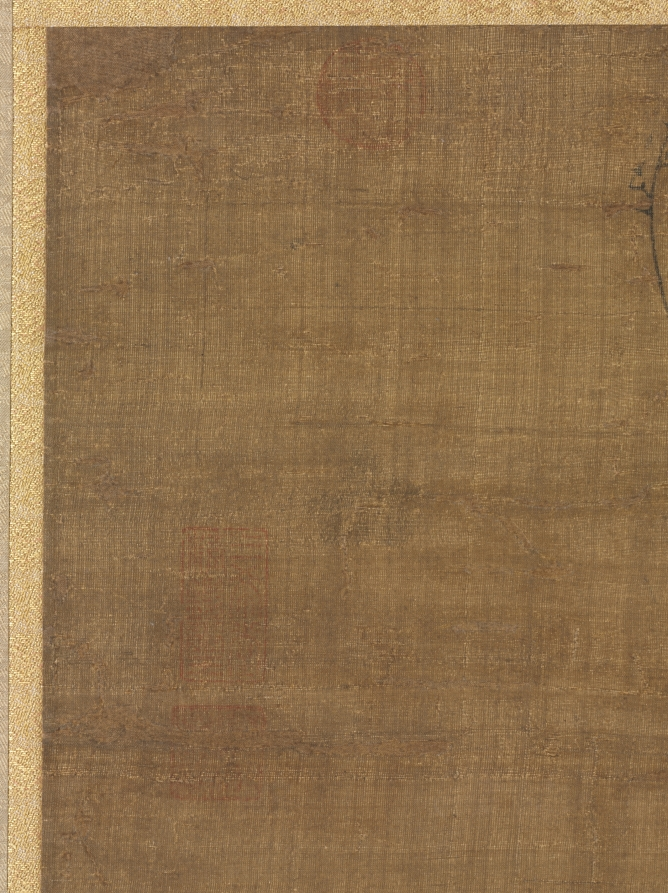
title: A Prunus in the Moonlight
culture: China, Yuan dynasty (1271-1368)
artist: Wang Mian (Chinese, 1287–1359)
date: 1300s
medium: Hanging scroll; ink on silk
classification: Painting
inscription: 8 additional seals: 6 of the Qianlong 乾隆 emperor (r. 1736-95); 2 of Dong Gao 董誥 (1740-1818).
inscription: 海雲初破月團團，獨鶴高飛夜未殘。/ 一片笙簫湖水上，玉妃含笑倚闌干。 王元章作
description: The plum flourishes in the mild climate of the south, and it was not before the Six Dynasties period (220– 589 CE) that the motif began to be appreciated by southern artists, many of whom had emigrated from the north. Wang Mian from Zhejiang province had failed the civil and military service examinations and later rejected appointments under the Mongol government. Instead, he chose to return home, making a living by selling plum paintings. Few of Wang’s works have survived, but they demonstrate that by his time the ink-plum (momei) genre was fully developed.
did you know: The painting portrays the plum in the nighttime, as indicated by the tint of the background and the presence of the moon.